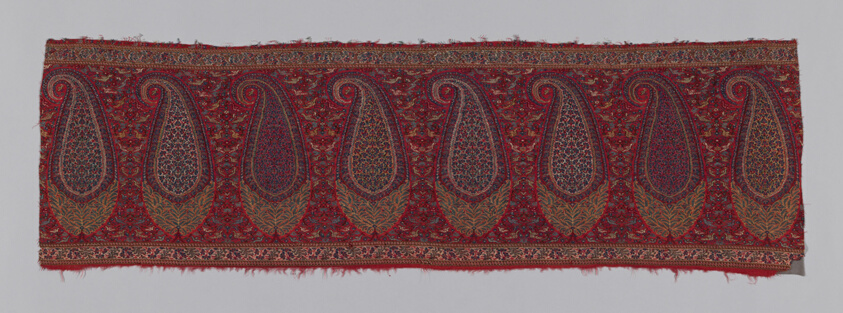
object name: Costume and Accessories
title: Shawl Border (Pallu)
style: 19th century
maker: India, Kashmir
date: c. 1820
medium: Wool, double interlocking 2:2 'S' twill tapestry weave; main warp fringe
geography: Kashmir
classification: textile; weaving; costume; costume - weaving; costume accessory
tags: paisley, floral, floral motifs